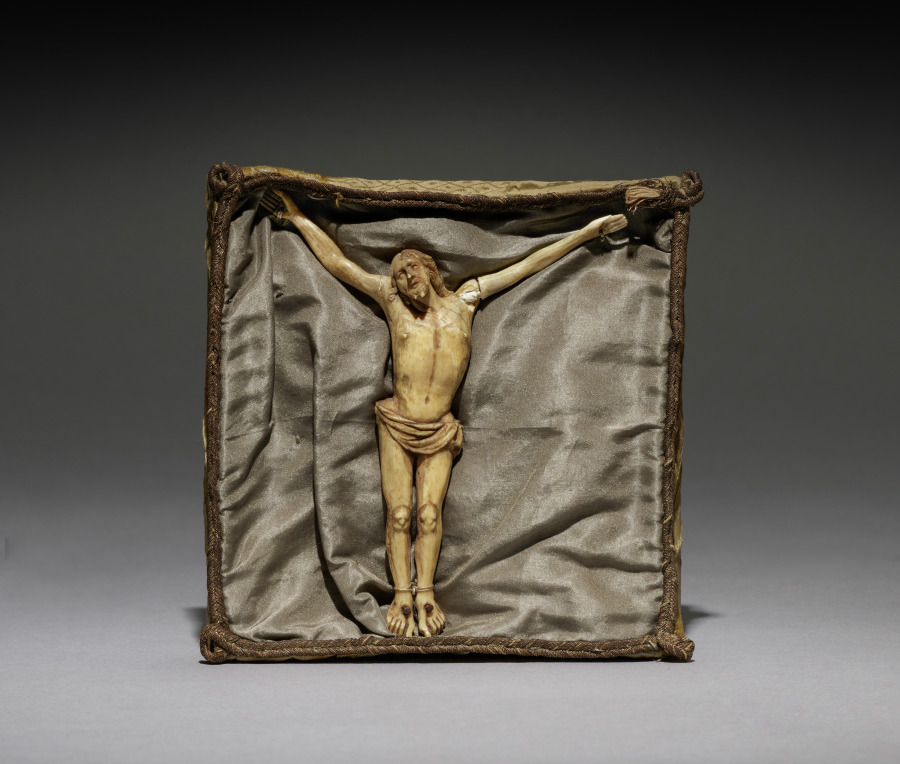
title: Christ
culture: France, 17th century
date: 17th Century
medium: ivory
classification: Ivory